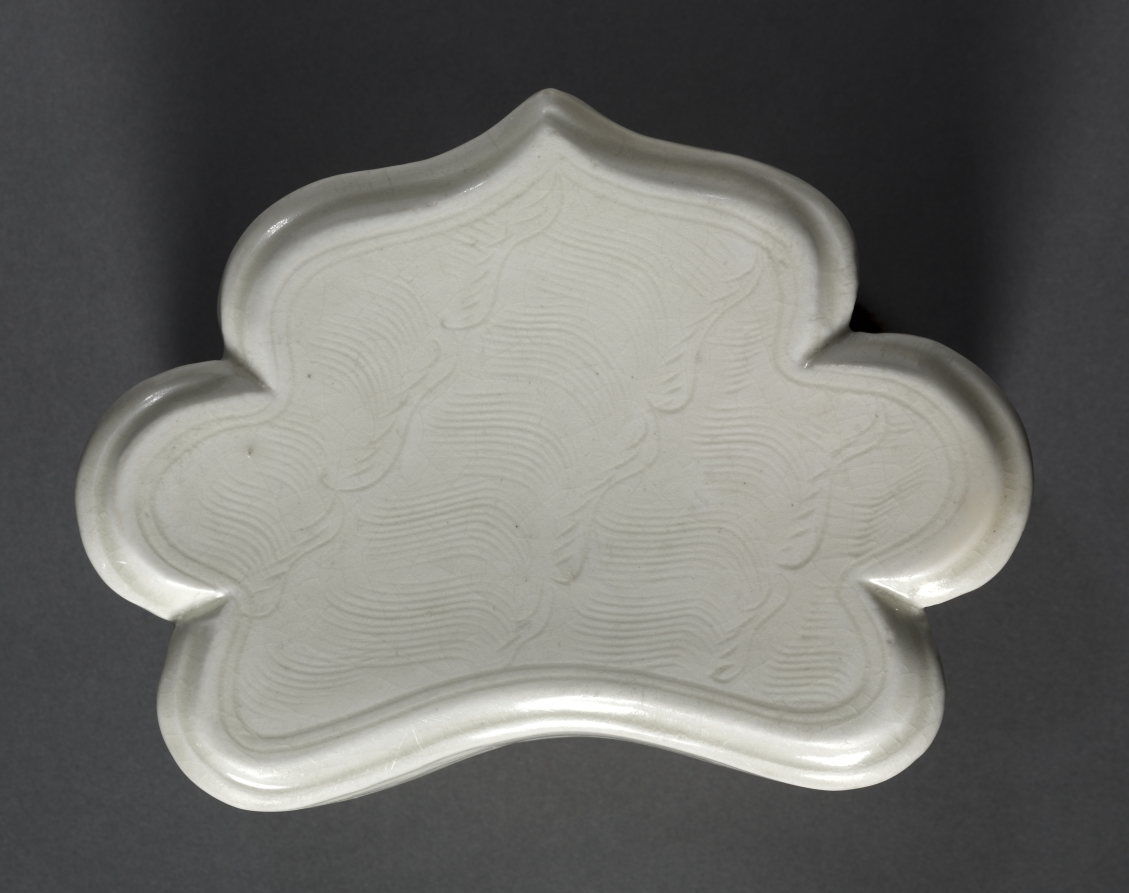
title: Cloud-Collar Pillow with Waves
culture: China, Jiangxi Province, Northern Song dynasty (960–1127)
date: 1000s–1100s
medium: glazed porcelain with incised and carved decoration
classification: Ceramic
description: This ceramic pillow in the form of a cloud—a design pattern variously referred to as ruyi, the shape of a head of an auspicious scepter—is a fine example of qingbai ware from Jiangxi province. It has a pure white body covered with a transparent, glassy glaze that carries a faint greenish tinge, thus giving it another name, yingqing, or "shadow blue." On the surface of the pillow is a carved and incised design of repeating wave patterns. The beauty of this piece lies in its elegance of form, simplicity of design, and delicacy of workmanship.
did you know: While ceramic might not be your choice for a pillow, it actually kept the user cool as they slept.